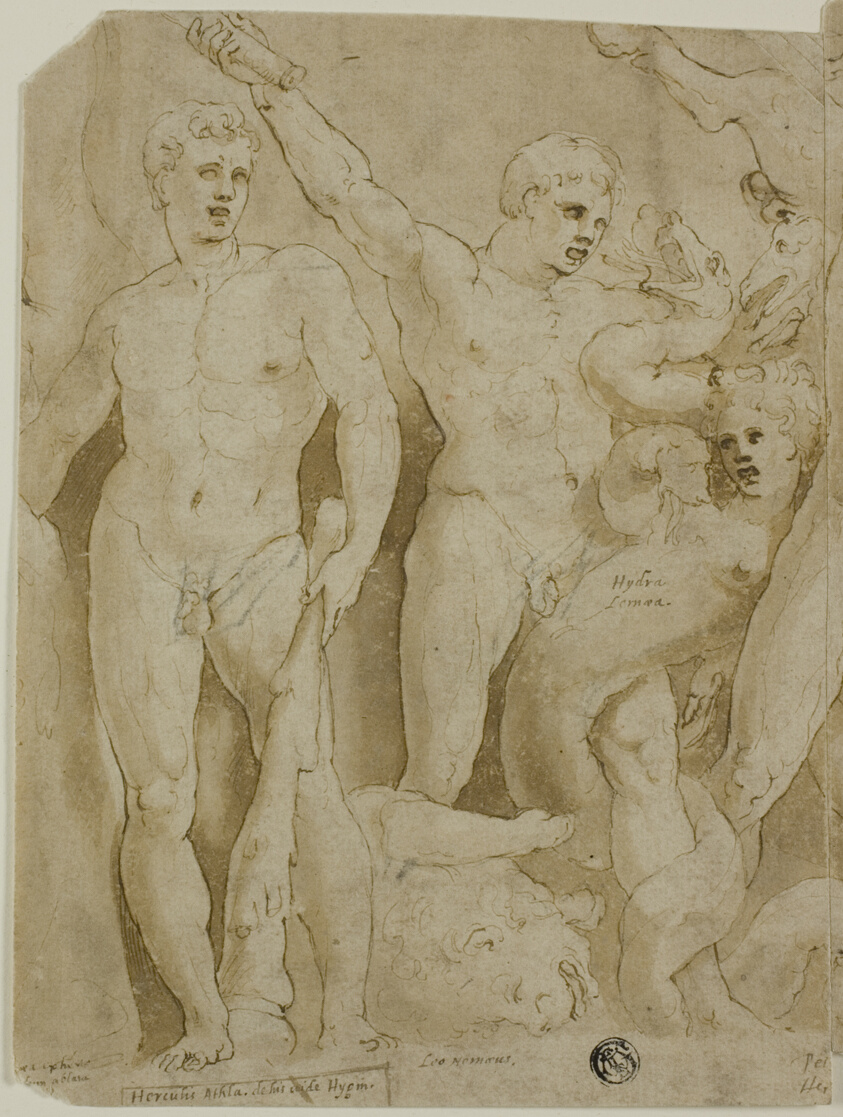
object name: Drawing and Watercolor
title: Ancient Sarcophagus Relief with the Labors of Hercules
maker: Attributed to Girolamo Sellari, called Girolamo da Carpi; Italian, 1501-1556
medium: Pen and brown ink with brush and brown wash, and traces of black chalk, on buff laid paper, pieced at center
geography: Italy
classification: ink with wash; drawings (visual works); prints and drawing